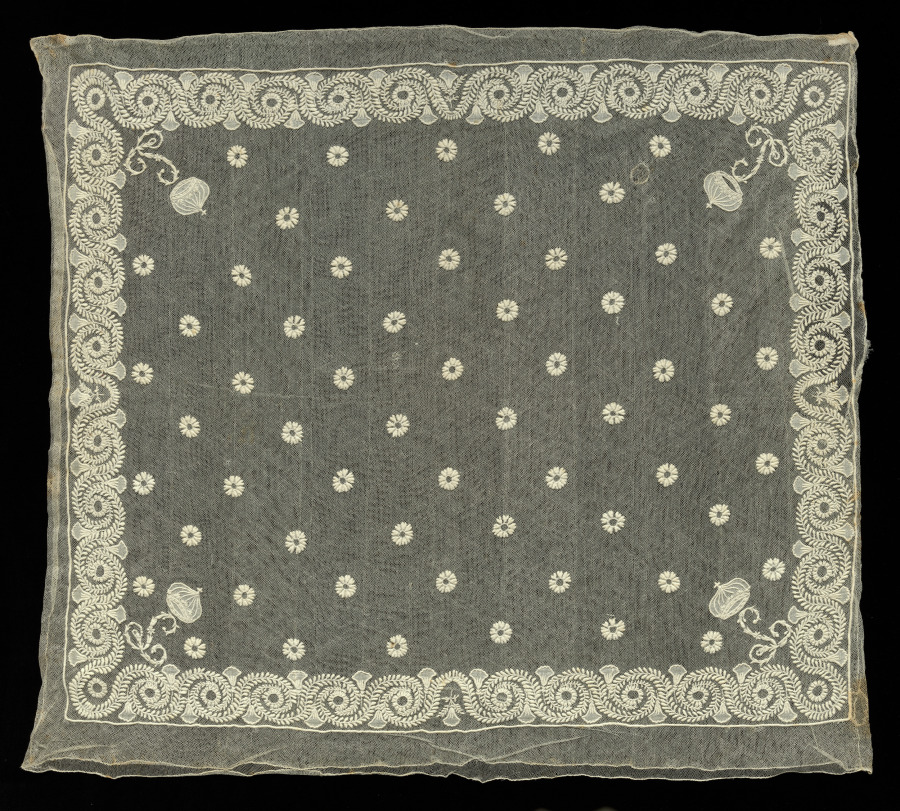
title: Lace Pillow Slip (one of a pair)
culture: France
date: 1811–15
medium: Cotton: machine made lace net; cotton embroidery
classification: Lace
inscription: in each corner, letter "L."